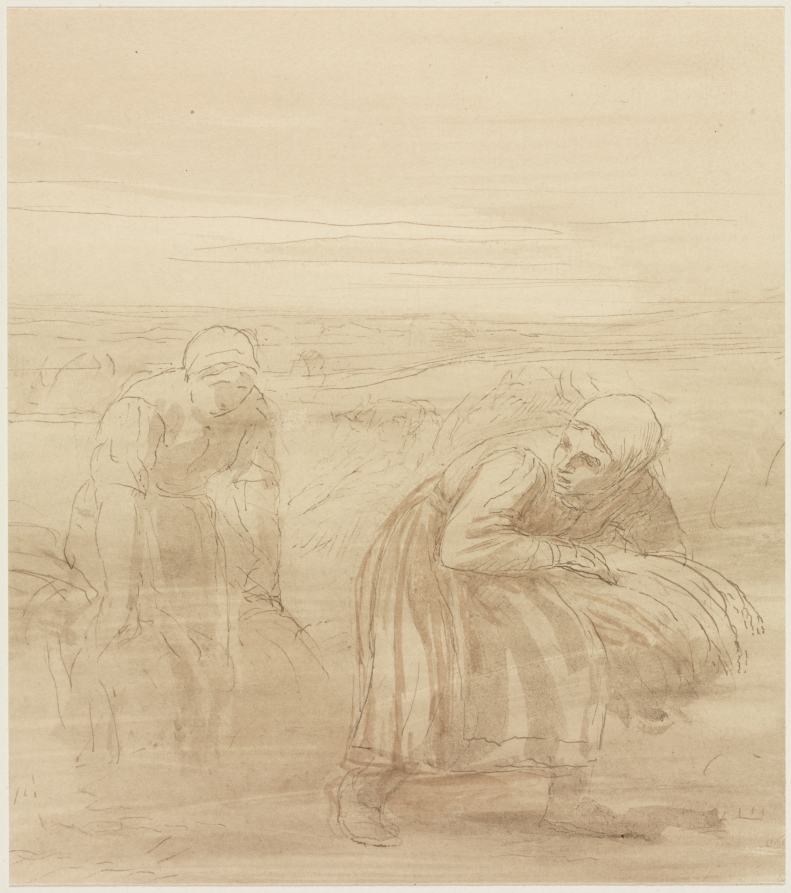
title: Les Glaneuses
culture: France, 19th century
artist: Alphonse Legros (French, 1837–1911)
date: 1800s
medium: sepia ink and wash on off-white paper, pastel down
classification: Drawing